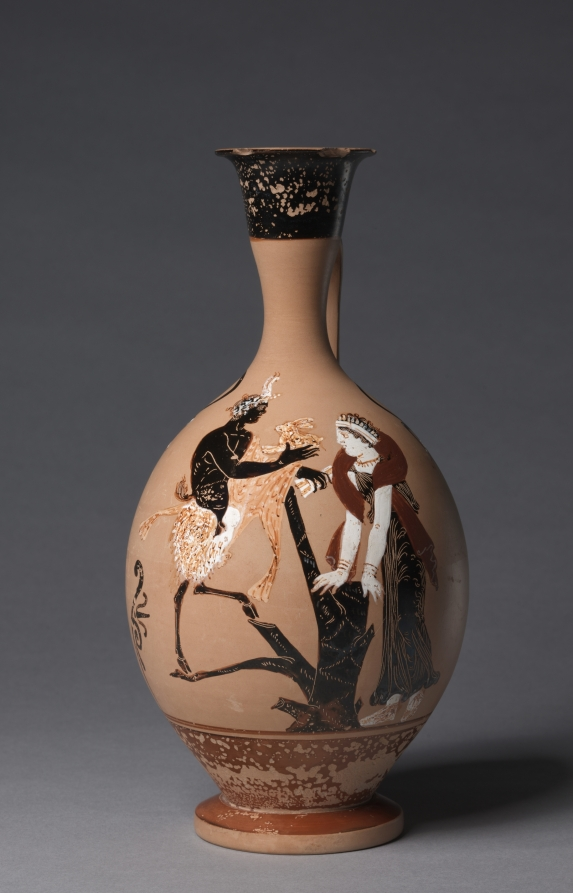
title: Black-Figure Lekythos (Oil Vessel): Pan Presenting Hare to Woman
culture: South Italian, Paestan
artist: attributed to Asteas/Python Workshop (South Italian, Paestan, active c. 360–320 BCE)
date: c. 330–320 BCE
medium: ceramic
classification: Ceramic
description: This round-bodied oil vessel, produced in Paestum, belongs to a small group of vessels decorated with black figure in the second half of the fourth century BC, long after the technique had previously fallen out of fashion. Unlike most such vessels, which are smaller and feature just a single figure (often a woman or bird), this one shows a more complex and colorful scene. The goat-legged god Pan perches on a branched tree trunk, holding his syrinx (panpipe) and a hare. Facing him, her hands on the trunk, is a draped woman, perhaps a nymph or the moon goddess Selene.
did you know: Although his name means “all” in Greek, Pan is primarily a god of shepherds.